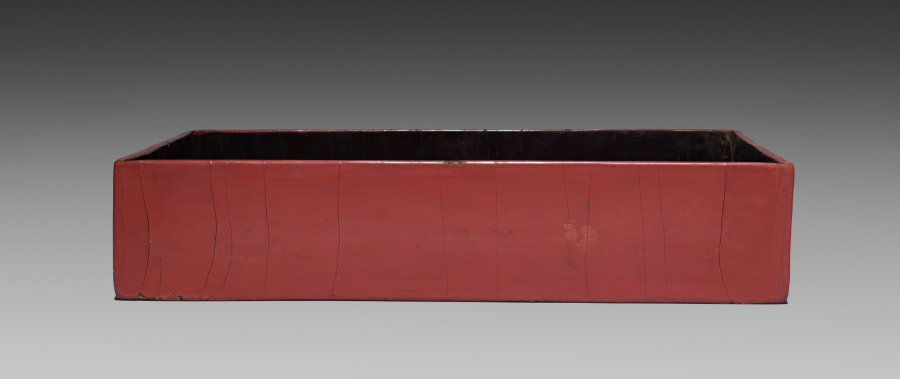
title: Drawer for a Tihong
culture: China, Ming dynasty (1368-1644), Wanli reign (1572-1620)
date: 1585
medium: carved cinnabar lacquer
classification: Lacquer